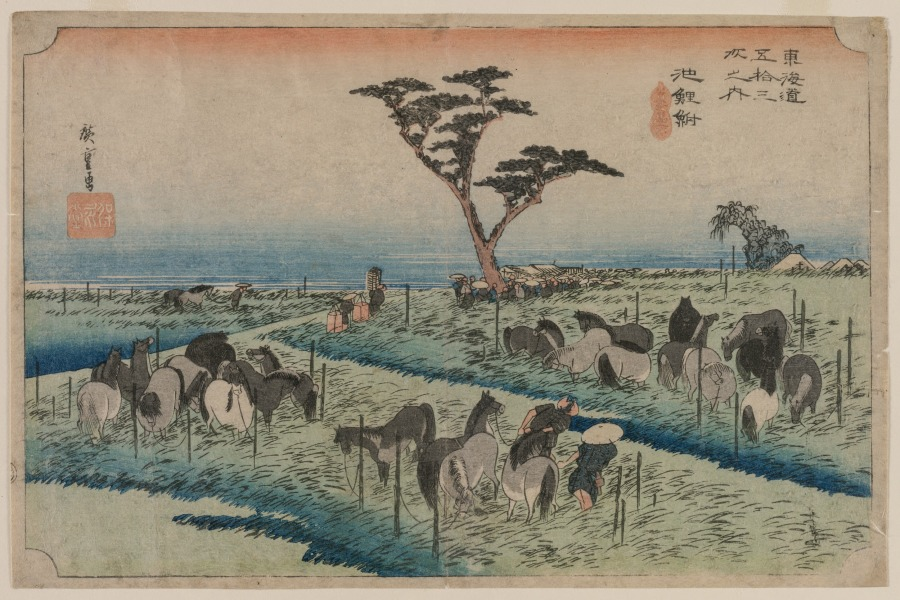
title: The Fifty-Three Stations of the Tokaido: Chiryu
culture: Japan, Edo period (1615–1868)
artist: Utagawa Hiroshige (Japanese, 1797–1858)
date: 1833–1834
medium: color woodblock print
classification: Print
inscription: Publisher: Hoeido